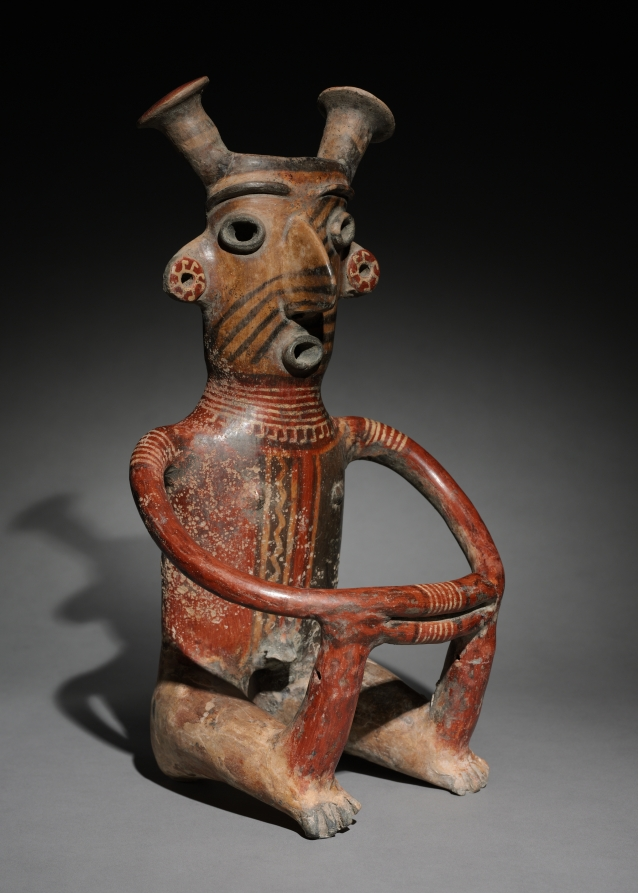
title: Seated Male Figure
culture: Mexico, Jalisco, Zacatecas Style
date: c. 200 CE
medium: earthenware with colored slips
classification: Sculpture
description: A female once accompanied this abstract male. The two may have had the same meaning as the nearby couple. They were also similarly linked by physical form, though the female’s head had no projections, the meaning of which is unknown. The size of the circle formed by the arms suggests that the figure once held something, perhaps a perishable offering.